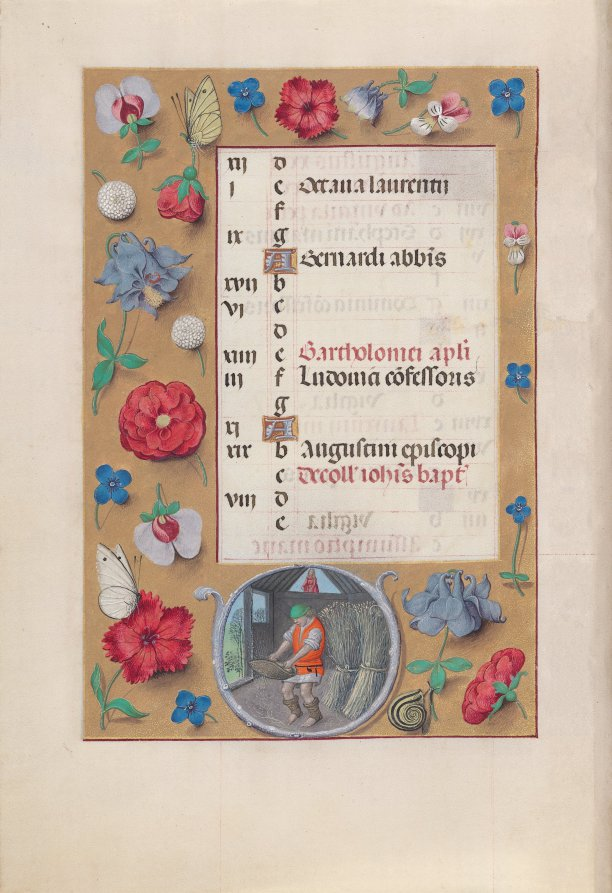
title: Hours of Queen Isabella the Catholic, Queen of Spain: Fol. 9v, August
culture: Flanders, Ghent and Bruges, late 15th century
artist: Master of the First Prayerbook of Maximillian (Flemish, c. 1444–1519)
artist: and Associates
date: c. 1500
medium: ink, tempera, and gold on vellum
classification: Bound Volume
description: This manuscript was illuminated by a circle of at least five highly organized manuscript painters active in the Flemish cities of Ghent and Bruges. The principal illuminator was Alexander Bening, who painted the majority of the book's miniatures. Manuscripts produced by this circle of artists are renowned for the decoration of their borders, which typically feature a rich variety of realistically-painted flowers, birds, and butterflies. This prayer book, called a book of hours, was intended not for a cleric, but for the private devotions of a lay person-in this case, Isabella the Catholic, Queen of Spain (1451-1504). Isabella's coat of arms embellishes the book's frontispiece. It is unlikely that the book was commissioned by the Queen herself; rather, she probably received it as a diplomatic gift from someone courting her patronage, perhaps Cardinal Francisco Jimenez de Cisneros. A Franciscan friar, Jimenez was dependent upon Isabella for his advancement, first to the post of Queen's confessor in 1492, and then to Archbishop of Toledo in 1495.